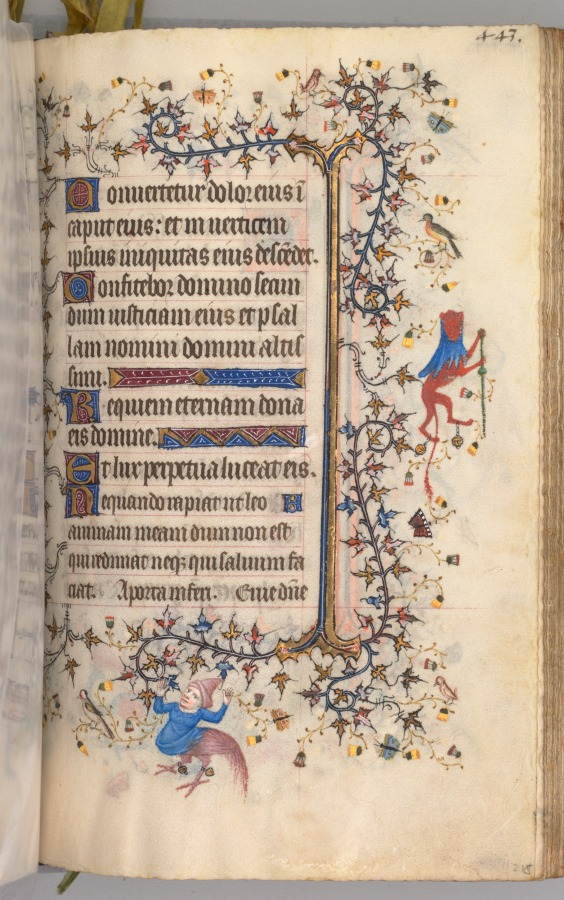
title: Hours of Charles the Noble, King of Navarre (1361-1425): fol. 216r, Text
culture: France, Paris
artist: Master of the Brussels Initials and Associates (French)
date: c. 1405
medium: ink, tempera, and gold on vellum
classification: Bound Volume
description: This precious volume was obviously highly prized by its owner, the French-born King of Navarre, who had his coat of arms painted on no less than twenty folios. Rather than directly commissioning this manuscript from a specific workshop, it seems that Charles the Noble acquired his book of hours -- perhaps ready-made for the luxury market -- while on a trip to Paris in 1404-05. A collaborative effort, six painting styles are evidenced within the pages of this codex, those of two Italians, two Frenchmen, and two Netherlanders. The painter who was responsible for the planning and decoration of the book, and who produced seventeen of the large miniatures, was a Bolognese artist known as the Master of the Brussels Initials. His principal assistant, responsible for most of the borders, was a Florentine who signed his name "Zecho" da Firenze on folio 208 verso.